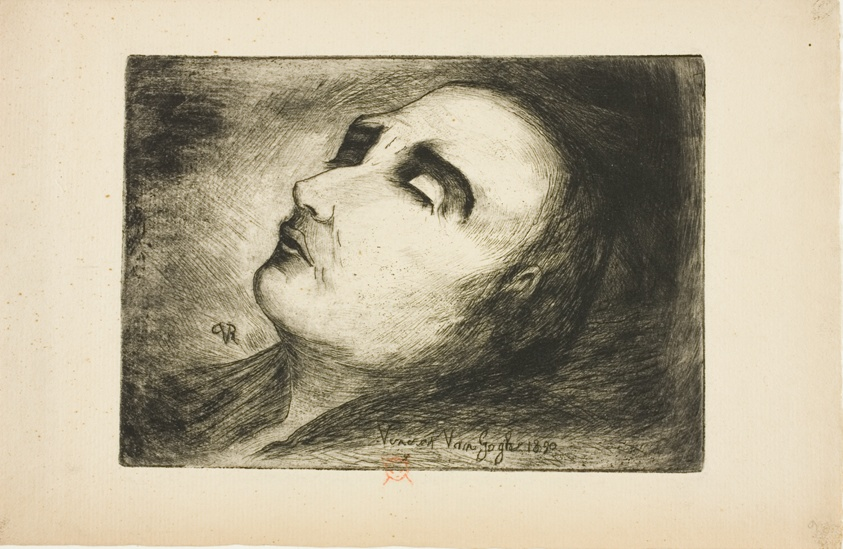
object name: Print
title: Vincent van Gogh on His Deathbed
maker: Dr. Paul Ferdinand Gachet; French, 1828-1909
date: 1890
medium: Etching in black on tan laid paper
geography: France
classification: etching; print; prints and drawing